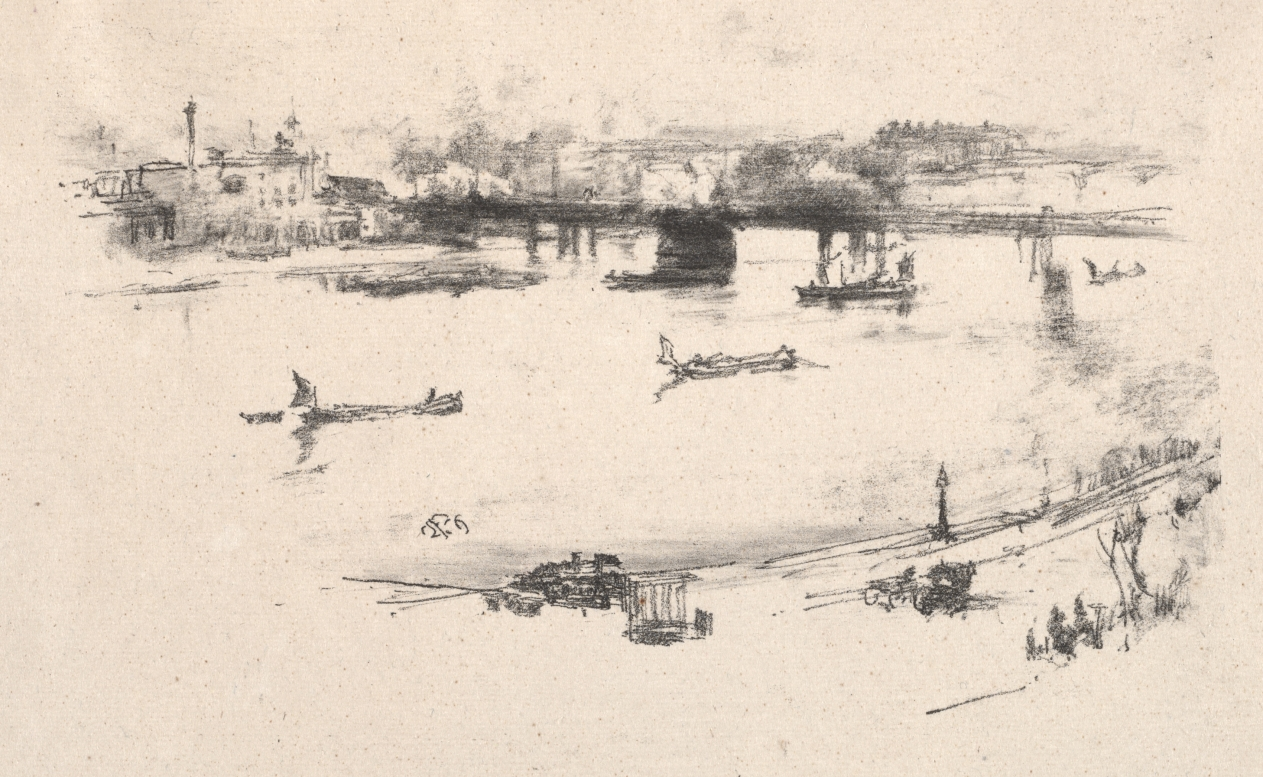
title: Charing Cross Railway Bridge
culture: America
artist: James McNeill Whistler (American, 1834–1903)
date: 1896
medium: lithograph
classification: Print